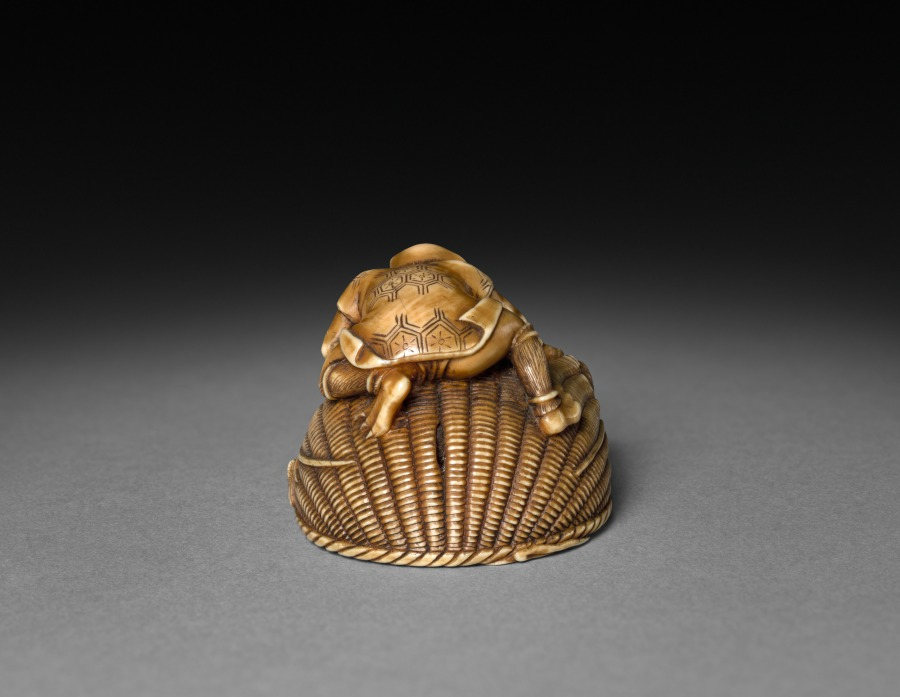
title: Demon Covering Shoki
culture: Japan, Edo period (1615–1868)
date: early to mid-1800s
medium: ivory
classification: Netsuke